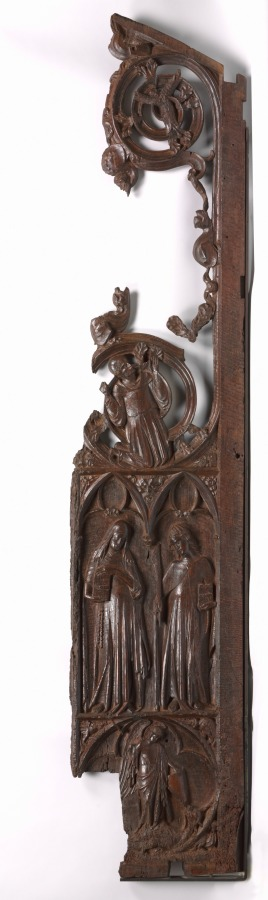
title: Pair of Panels from a Choir Stall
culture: Spain, Catalonia, Monastery of Pedralbes, 14th century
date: c. 1330–1340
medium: walnut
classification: Furniture and woodwork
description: The two larger panels-shown here in a fanciful arrangement-were probably the end panels of two stalls that faced each other across the choir of a Gothic church. The third and smaller panel originated from an interior portion of one of these stalls. The first large panel is carved with the figure of St. Francis of Assisi kneeling in prayer and receiving the stigmata. Two standing figures also appear on this panel: a nun at the left (perhaps St. Claire) and a female martyr at the right. Below is St. Michael and the dragon. The second large panel depicts a seated pope, possibly Urban IV, who holds the keys of St. Peter and a book. The small panel shows a female figure in a long gown standing on a plinth above two of the apocalyptic beasts, the winged lion of St. Mark and the winged ox of St. Luke, which are supported by a wyvern (a heraldic winged dragon). Both sides of this interior panel are intended to receive the missing seats.